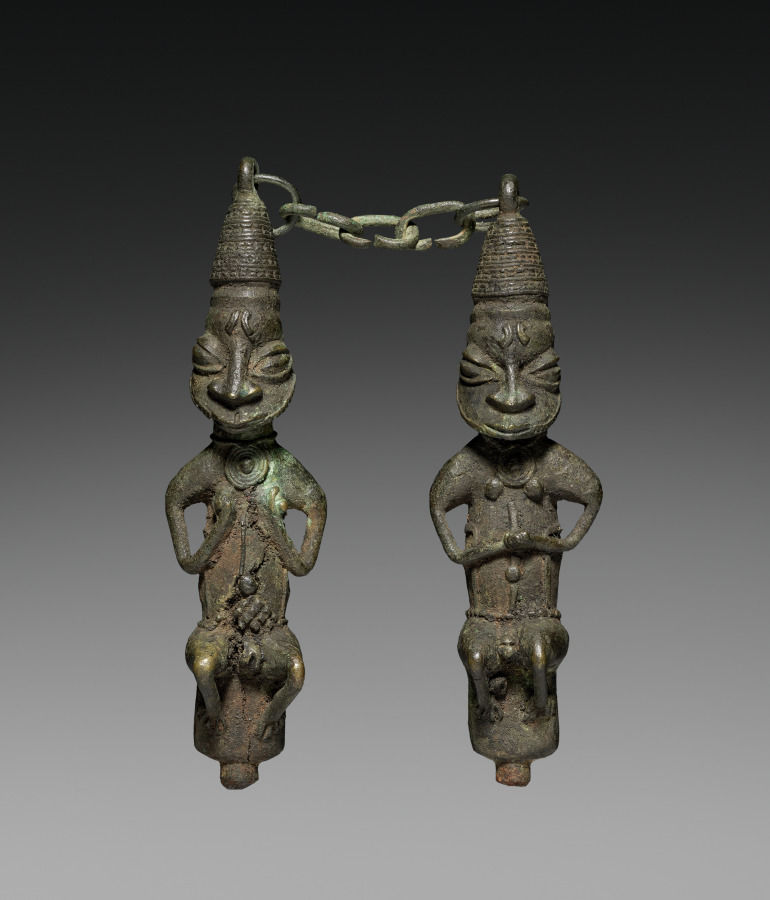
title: Pair of Ritual Staffs (ẹdan Ògbóni)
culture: Africa, West Africa, Nigeria, Yorùbá-style maker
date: possibly 1800s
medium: Copper alloy and iron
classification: Sculpture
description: The chain connecting these two figures allows them to be worn in public by a member of the Ògbóni or Òṣùgbó association as authority emblems. The male on the right gives the association’s typical salute by clasping his left fist on the right one, while the female on the left holds her breasts as a sign of welcome and generosity. The use of copper alloy and iron expresses Ògbóni/Òṣùgbó's concerns with longevity and durability.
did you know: Imagine how this would look when its owner wore it; the chain would go around the back of the neck and the figures would rest on their chest.